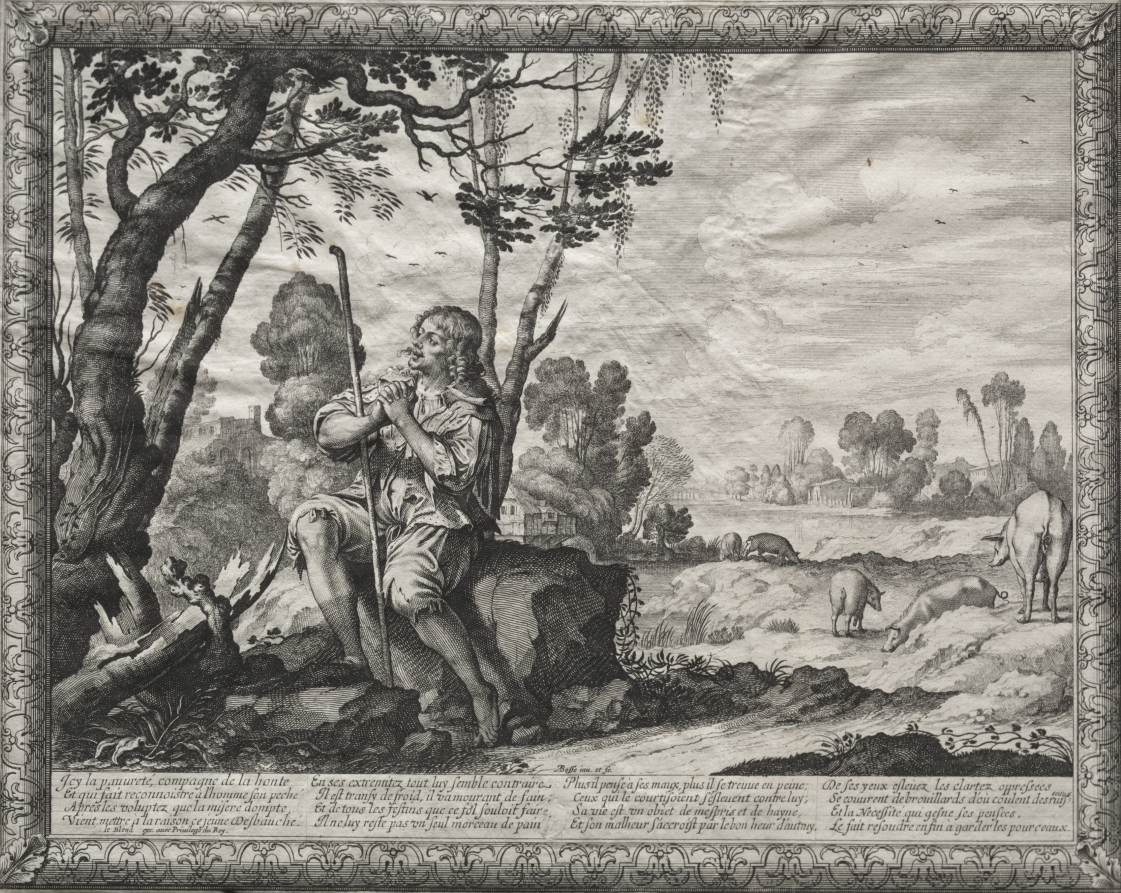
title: The Prodigal Son: The Prodigal Tending the Pigs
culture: France, 17th century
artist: Abraham Bosse (French, 1602–1676)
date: 1635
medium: etching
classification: Print